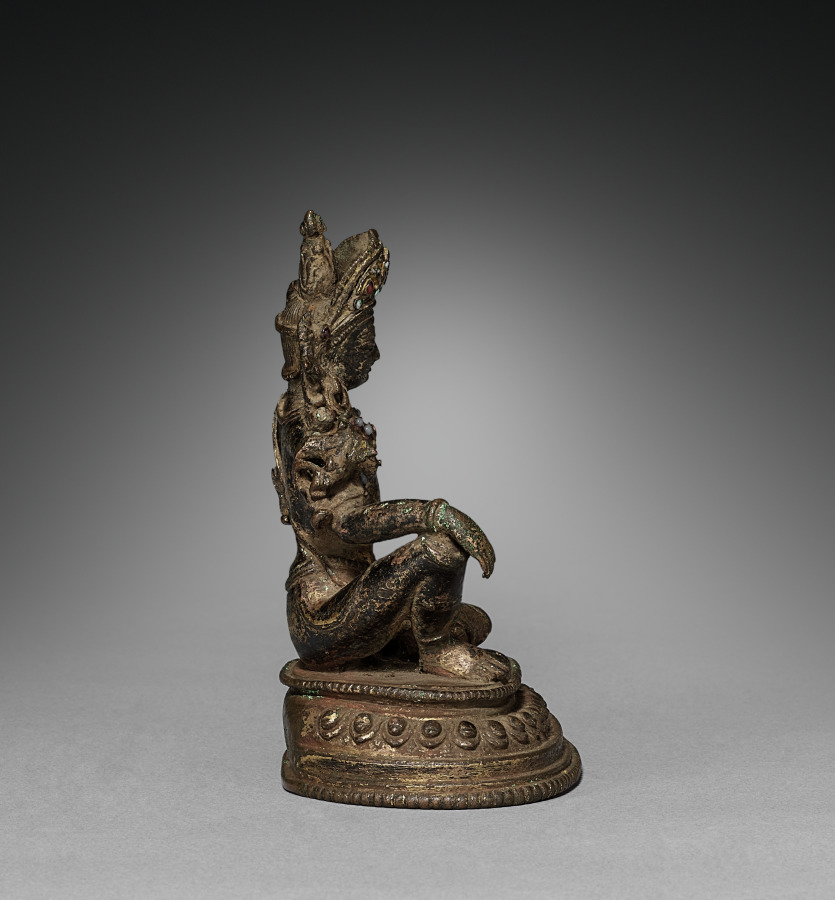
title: Avalokiteshvara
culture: Nepal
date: 1300s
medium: gilt bronze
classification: Sculpture